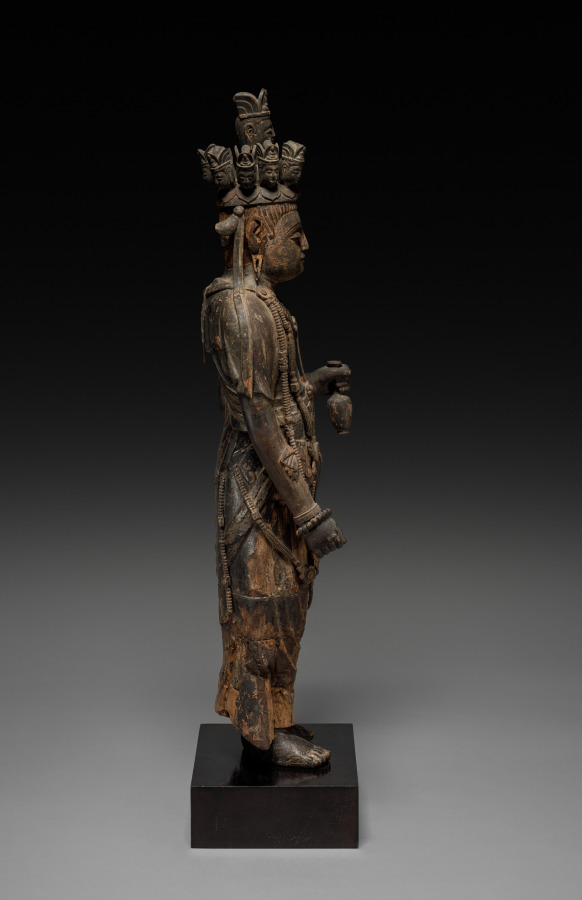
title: Eleven-Headed Guanyin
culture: China, Tang dynasty (618–907)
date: late 600s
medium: wood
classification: Sculpture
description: Guanyin, the bodhisattva of infinite compassion, can be identified by his attributes, carrying a tiny Amida Buddha in his crown, and holding a bottle with the nectar of life in his left hand. The eleven-headed Guanyin, in particular, has his eyes and ears open in all directions to hear, see, and help all those who are in distress. The garment and jewelry of this graceful figure remind us that the historic Buddha Shakyamuni was originally an Indian prince before he reached enlightenment. Upon his death, he entered nirvana, an eternal state free of desire and suffering, outside the realm of birth, death, and rebirth. The dating and attribution of the figure as being from China needs further study.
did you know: The sculpture was made of different types of wood with different grain sizes and patterns, which are connected with wood pegs and glue.